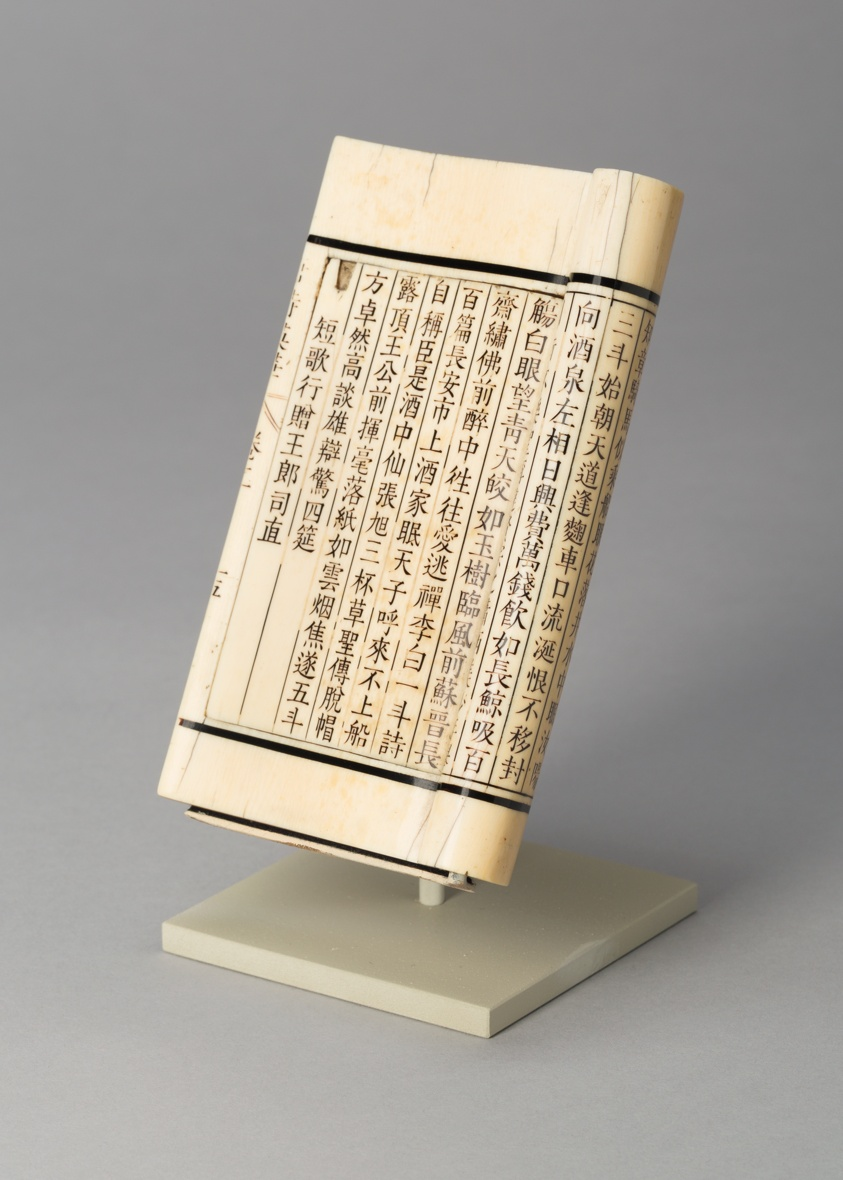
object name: Decorative Arts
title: Open Book with Poem by Du Fu Describing the Eight Immortals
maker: China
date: Qing dynasty (1644–1911), late 17th–early 18th century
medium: Ivory, text carved and inked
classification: decorative arts